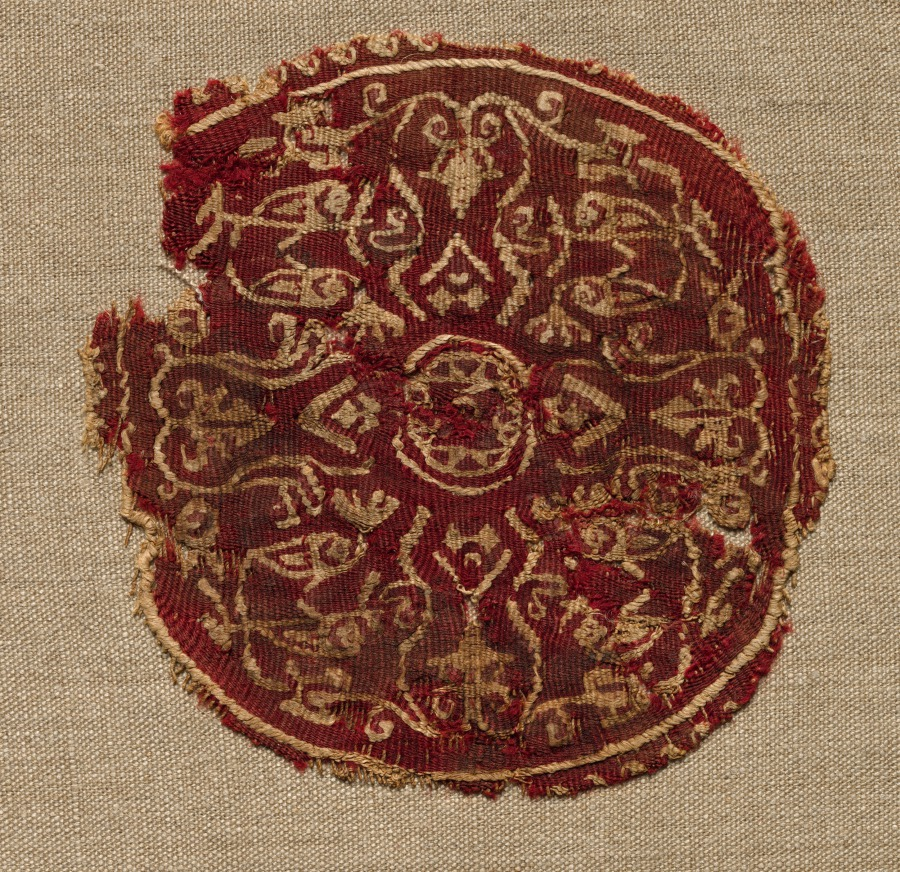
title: Segmentum from a Tunic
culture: Egypt, Abbasid period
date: mid 700s - mid 800s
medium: tapestry; wool and linen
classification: Textile